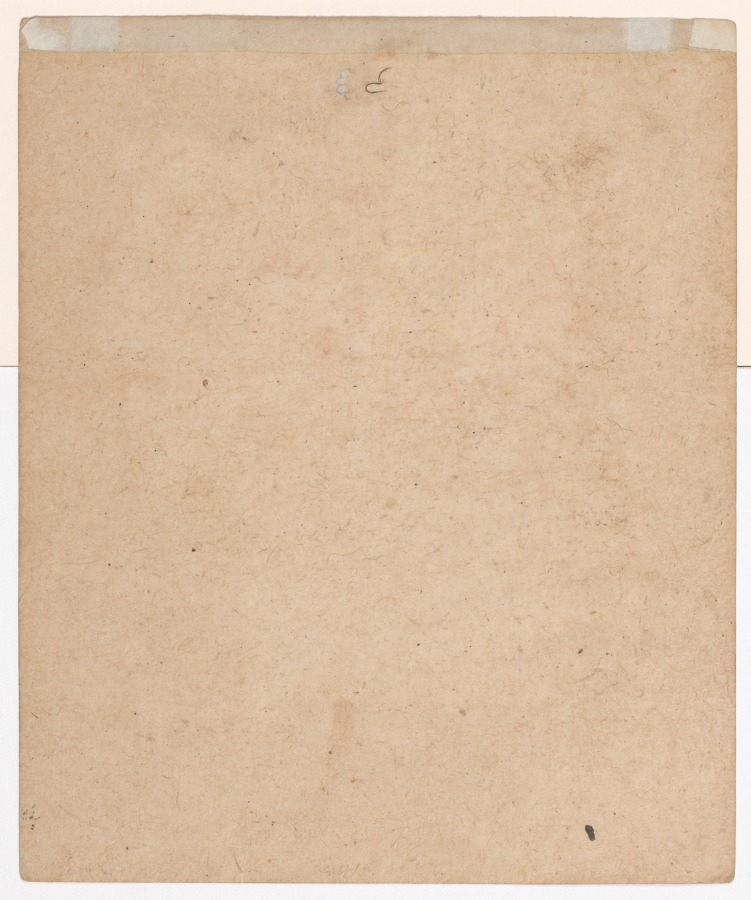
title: Sagittarius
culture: Northern India, Pahari kingdoms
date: c. 1810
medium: gum tempera and gold on paper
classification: Painting